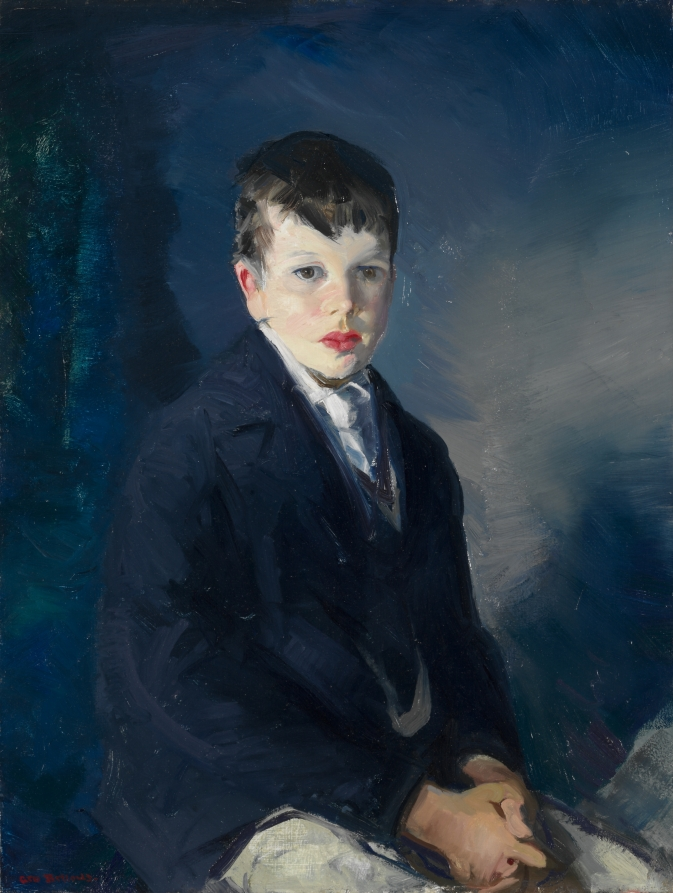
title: Boy in a Blue Coat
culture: America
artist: George Bellows (American, 1882–1925)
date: 1915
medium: oil on canvas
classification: Painting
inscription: signed lower left: Geo Bellows.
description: George Bellows created this work during July 1915 in Ogunquit, Maine. Because of frequent rainy weather, the artist tended to paint indoors, focusing on portraiture. The identity of the sitter in this example remains unknown.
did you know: George Bellows painted more than 140 portraits during his brief career.